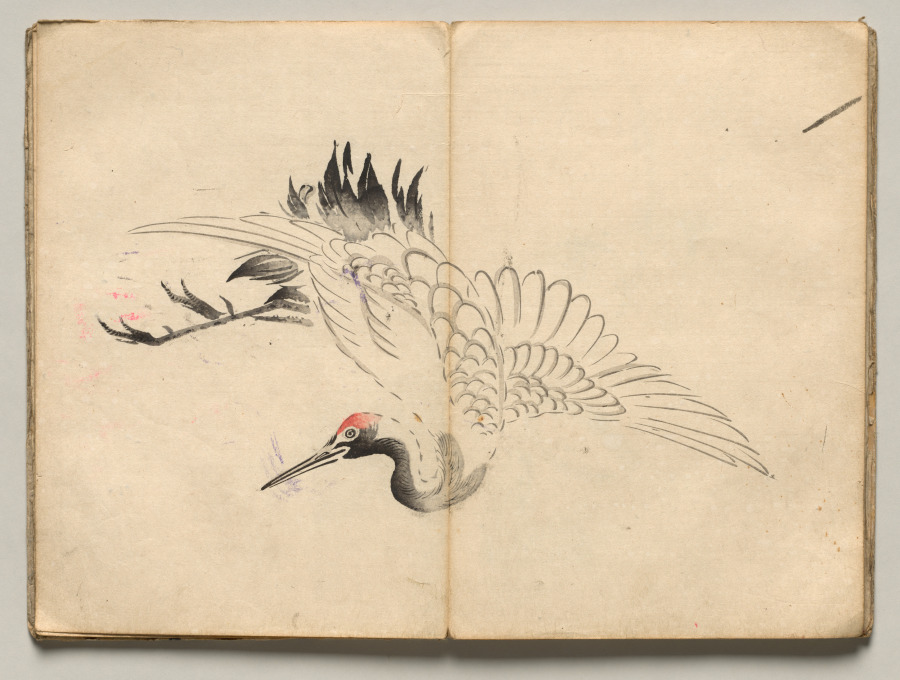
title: Crane from Ōkyo Picture Book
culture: Japan, Edo period (1615–1868)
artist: after Maruyama Ōkyo (Japanese, 1733–1795)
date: 1850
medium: accordion-style woodblock printed folding-book; ink and color on paper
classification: Bound Volume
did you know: This impression of a book of woodblock-printed designs is missing a spread that depicts a crane.